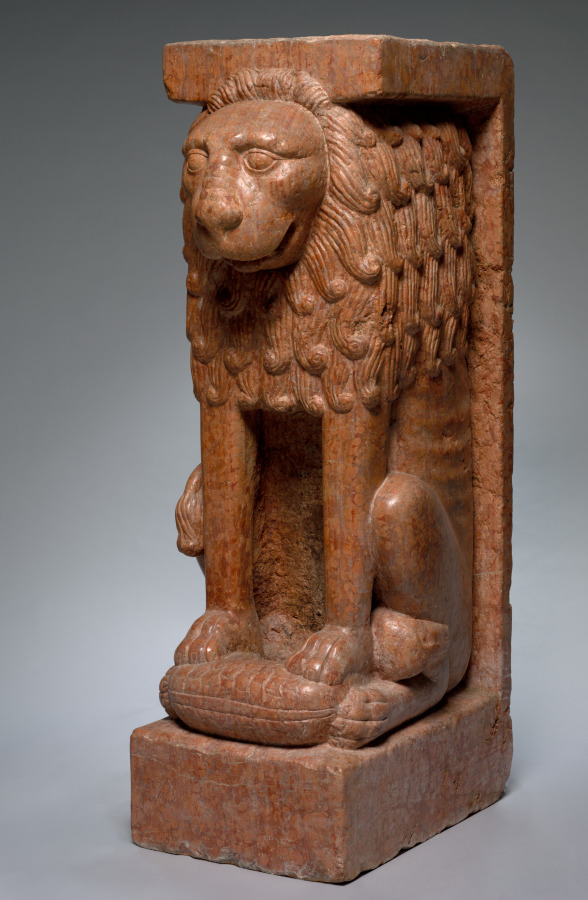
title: Supporting Lion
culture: Italy, style of the 13th century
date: style of the 1200s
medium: pink limestone (known as "Verona Marble")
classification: Sculpture